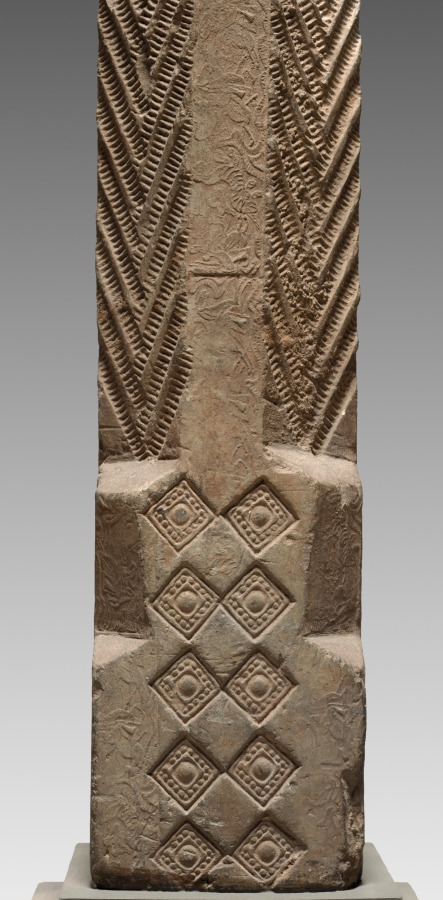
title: Hollow Tile: Column from Tomb-Chamber Doorway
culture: China, Han dynasty (202 BCE–220 CE)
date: 100–200 CE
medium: earthenware, die-stamped relief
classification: Ceramic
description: Striding tigers (top), racing horsemen (right column), and reverent officials (left column) are stamped into the surface of this underground portal to a tomb. The doorway preserves in stone the post-and-lintel structure, a basic element of Chinese wooden architecture. By the first century CE, a revolution in Chinese tomb construction and furnishing had taken place. Tombs lined with decorated bricks and tiles replace the earlier tombs constructed with only rammed-earth walls. Ceramic surrogates or models of stoves, houses, servants, and pets filled these more durable chambers, symbolically extending the creature comforts of this world into the world after death.